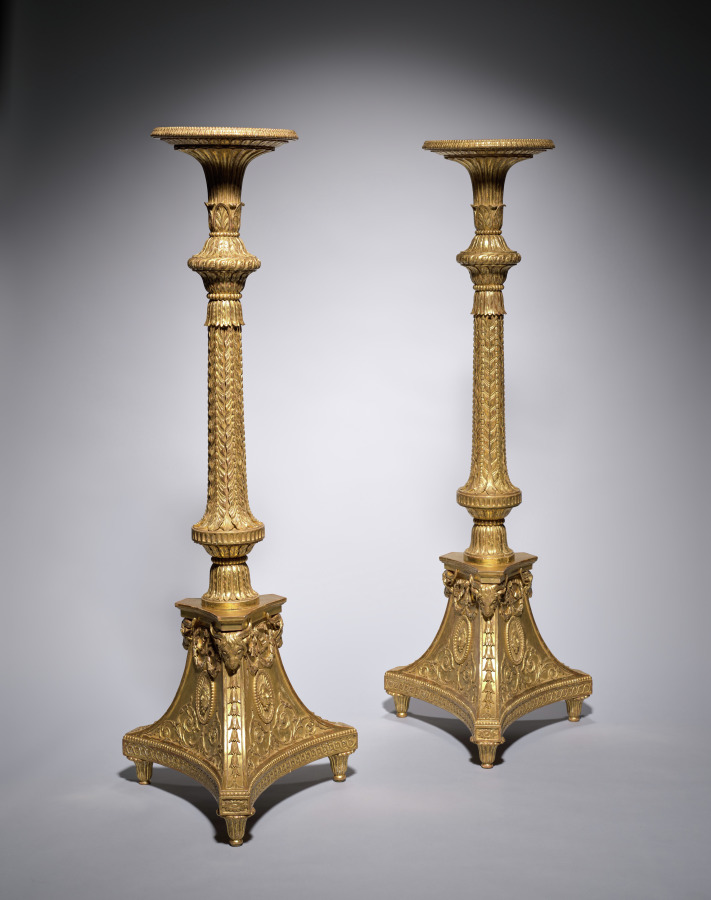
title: Pair of Candle Stands (torchères)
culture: England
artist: Thomas Chippendale (British, 1718–1779)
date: c. 1773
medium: Gilt-wood, gesso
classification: Furniture and woodwork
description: This pair of gilded candle stands was made by Thomas Chippendale, the most renowned cabinetmaker in eighteenth-century London, for the grand drawing room of Brocket Hall, a large country house in Hertfordshire, England. With finely carved acanthus leaves, swags, fluting, and oval masks depicting the Roman goddess Diana, these candle stands exhibit Chippendale’s masterful understanding of neoclassical proportion, scale, and ornament. His landmark book of furniture designs, The Gentleman and Cabinet-Maker’s Director (first published in 1754), was highly admired as a source of inspiration by cabinetmakers and architects around England as well as in Europe and America.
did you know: Candle stands usually held silver or crystal candelabra that were lit for evening entertainment.